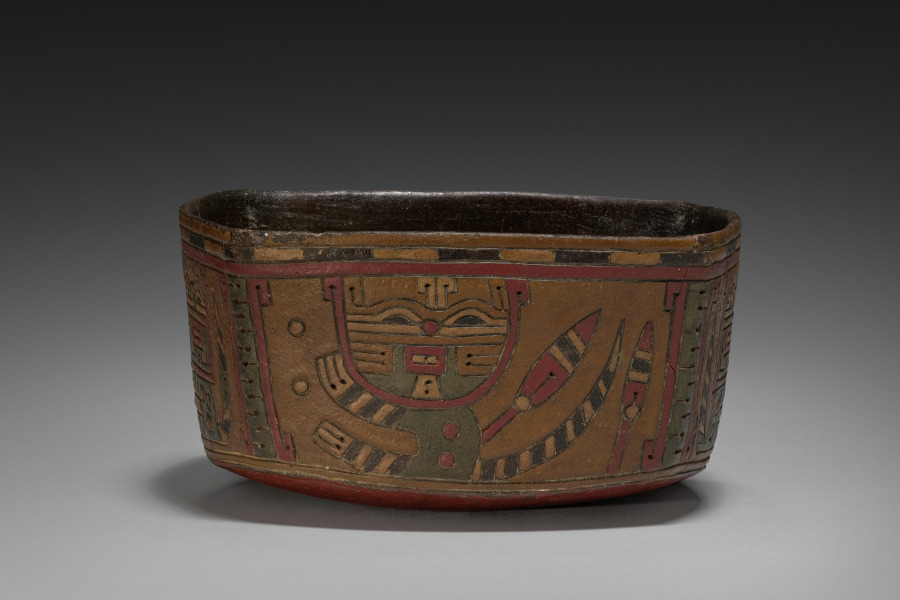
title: Square Bowl with Pampas Cats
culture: Central Andes, South Coast, Paracas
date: 500–400 BCE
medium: Ceramic, post-fire paint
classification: Ceramic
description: The Paracas often decorated their ceramics with geometricized representations of the native Pampas cat, a small, reclusive, wild feline that lives on the margins of agricultural fields, where it preys on the rodents and other pests that are a farmer’s bane. Thus, the ancients seem to have linked it to nature’s fertility and, by extension, human prosperity and continuity.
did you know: The animal shown on this bowl is the Pampas cat, a small, wild feline.